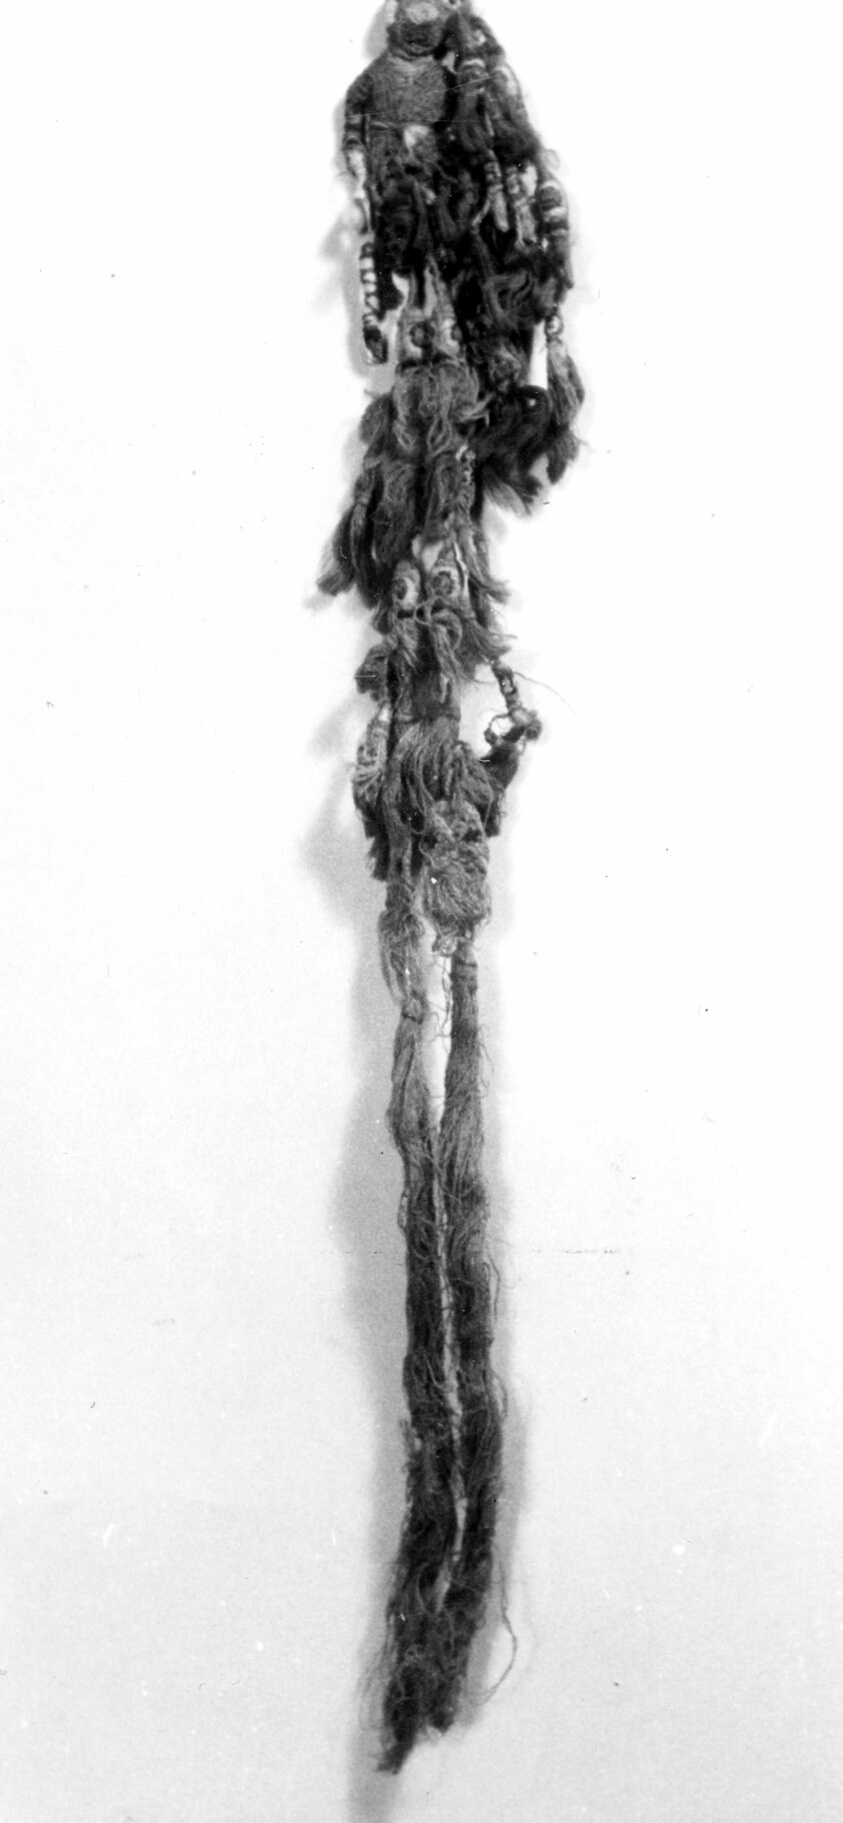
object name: Textile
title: Tassel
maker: Peru, Possibly central coast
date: A.D. 1000/1476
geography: Peru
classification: textile; weaving